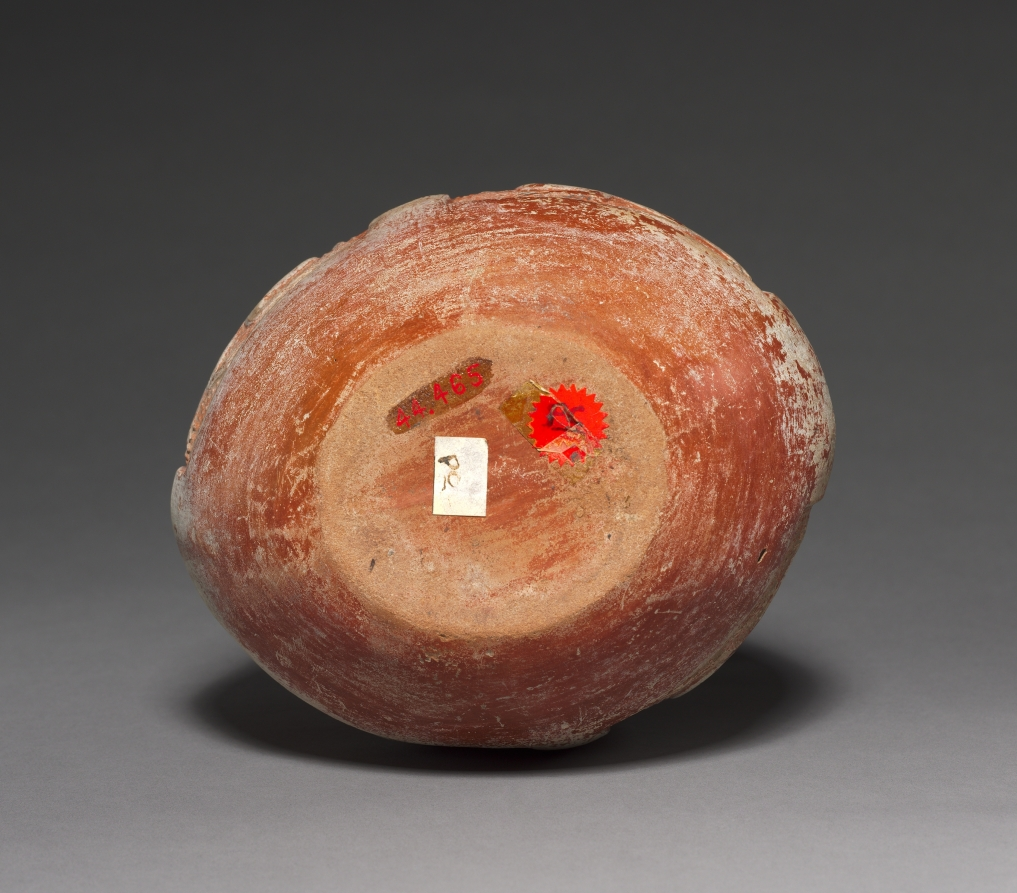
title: Urn or Jug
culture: Peru, 16th century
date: 1532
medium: pottery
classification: Ceramic